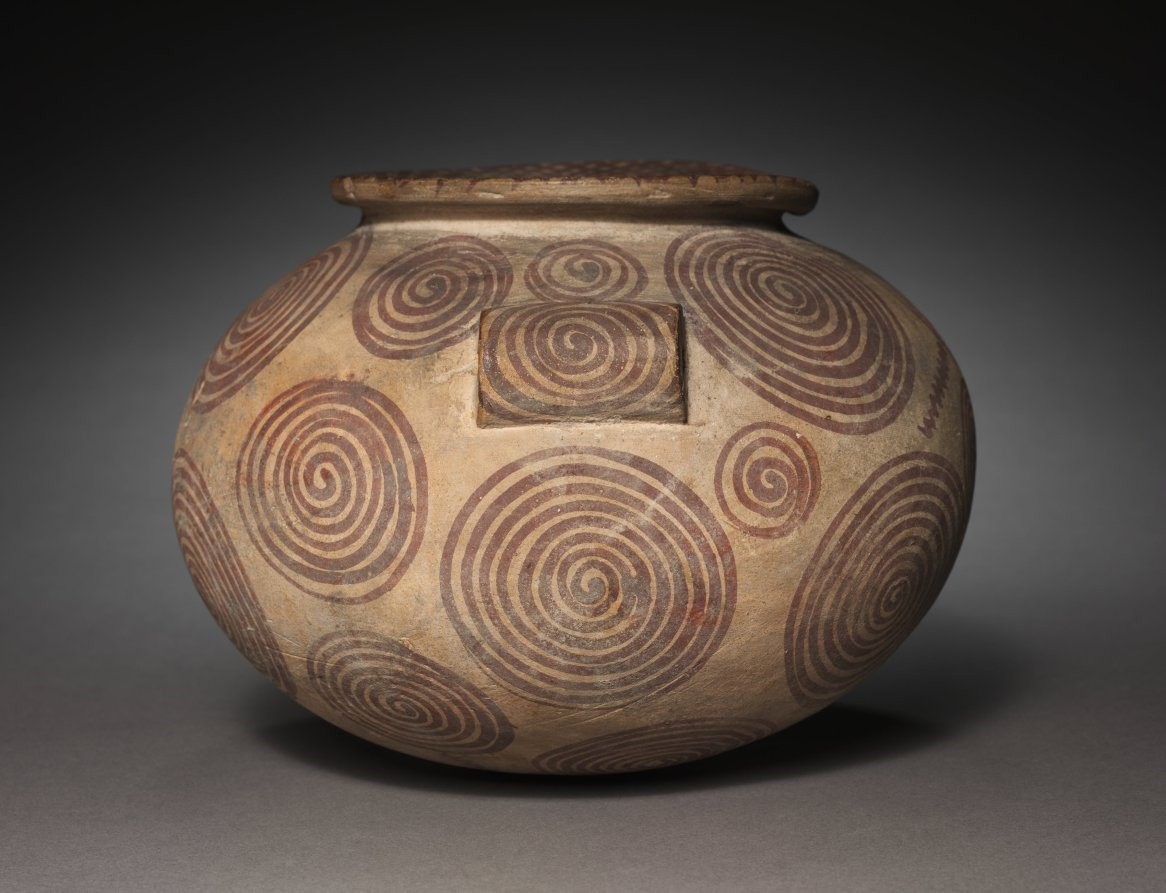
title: Squat Jar with Lug Handles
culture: Egypt, Predynastic (5000–2950 BCE), Naqada IIb (3650–3300 BCE)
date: 4000–3000 BCE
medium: marl clay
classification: Vessels